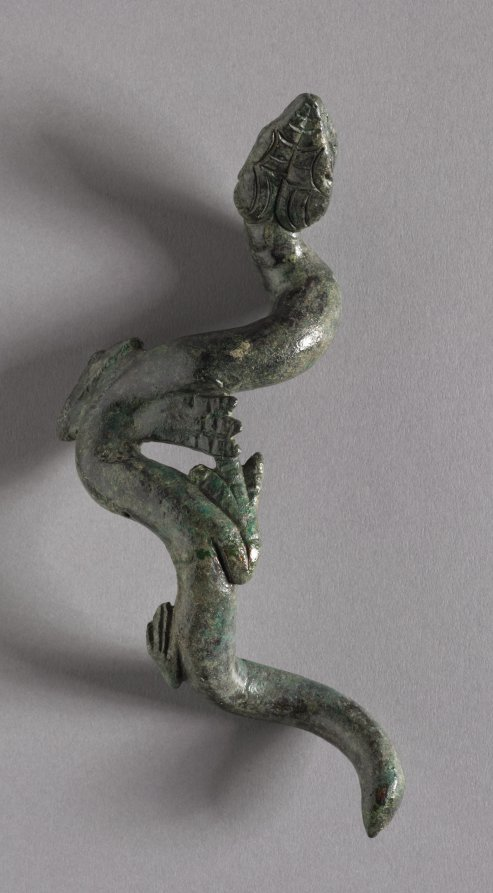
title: Detached Creature from the Cleveland Apollo: Apollo Sauroktonos (Lizard-Slayer) or Apollo the Python-Slayer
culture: Greece, Athens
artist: attributed to Praxiteles (Greek, Athenian, c. 400–330 BCE)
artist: or Follower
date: c. 350–200 BCE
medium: bronze, copper and stone inlay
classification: Sculpture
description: Both snakelike and lizardlike in appearance, the creature has a scaly head and four small feet. These are attached asymmetrically to its long and sinuous body, some with carefully delineated toes, others less detailed. The smallest foot falls behind a line bisecting the creature, where radiography shows a pin joining two separately cast sections. Although the bronze of the front and back halves is quite similar, the front half shows greater porosity (air bubbles). Perhaps the original back half was damaged during casting, necessitating a new or re-casting of that portion of the creature, with a smaller, relocated fourth leg.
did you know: Despite its small size, the creature was cast in two solid parts.